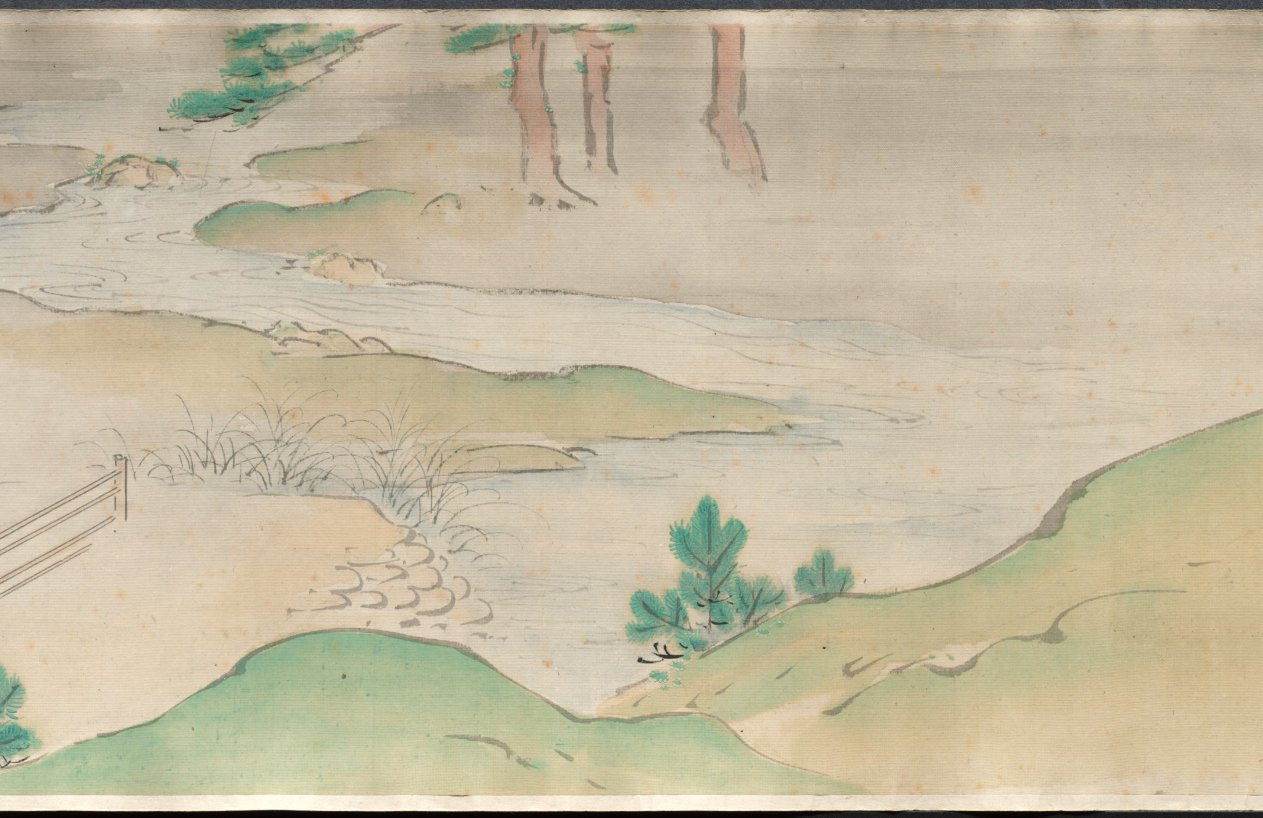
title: The Shadow Dancers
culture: Japan, Edo period (1615–1868)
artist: Yamamoto Baiitsu (Japanese, 1783–1856)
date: 1800s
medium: handscroll, ink and color on silk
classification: Painting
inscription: artist's signature and two seals at end of painting.